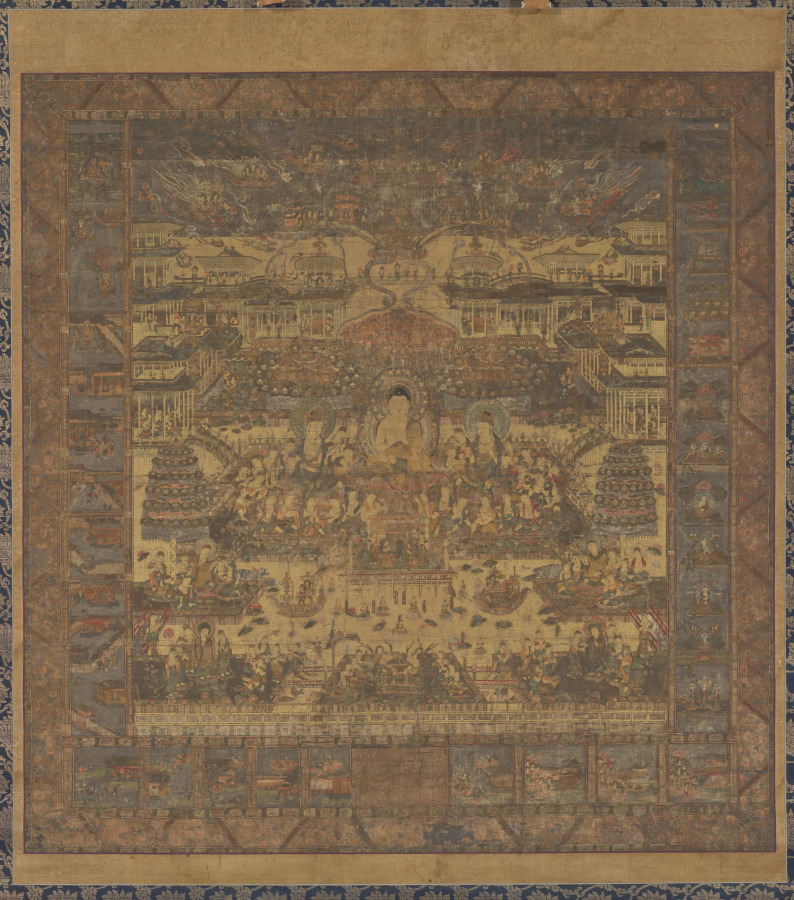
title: Taima Mandala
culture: Japan, Kamakura period (1185–1333)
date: early 1300s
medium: hanging scroll; ink, color, and gold on silk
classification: Painting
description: This painting is a copy after an 8th-century woven mandala belonging to the temple Taimadera. The composition is based on a sacred text that describes the Buddha Shakyamuni’s explanation of Amida’s Pure Land to Queen Vaidehi, as well as his instructions to her on visual meditation upon the Pure Land. The Pure Land appears at the center of the painting. To the left is the story of Queen Vaidehi’s encounter with Shakyamuni, and to the right are the scenes she is given to visualize. The bottom illustrates the nine levels of birth that can be attained in the Pure Land.